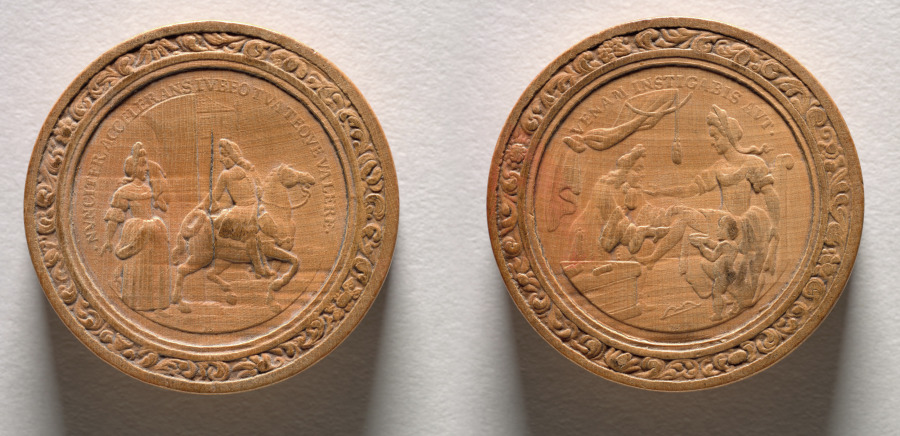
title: Gaming Piece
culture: Germany, late 17th-early 18th Century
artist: Martin Brunner (German, 1659–1725)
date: c.1700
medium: wood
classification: Furniture and woodwork